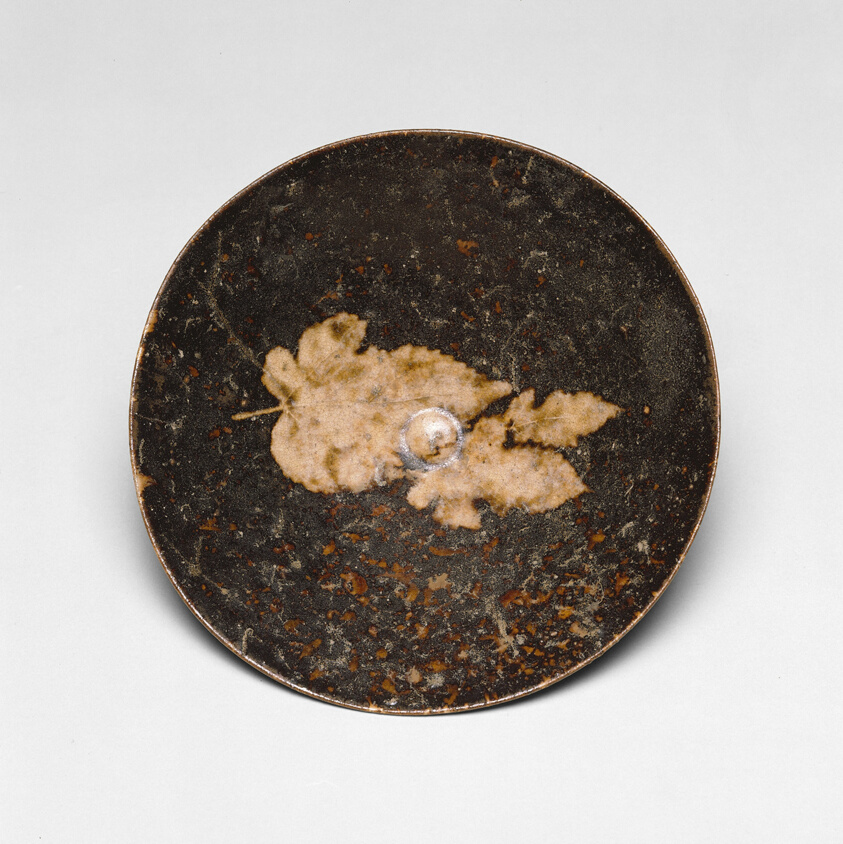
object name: Vessel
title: Conical Bowl with Decoration of Three Leaves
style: Chinese (culture or style)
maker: China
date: Southern Song dynasty (1127–1279), 12th/13th century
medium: Jizhou ware; glazed stoneware with kiln transmutations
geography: China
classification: bowl; porcelain; dish (vessel); asian art; ceramics; vessel